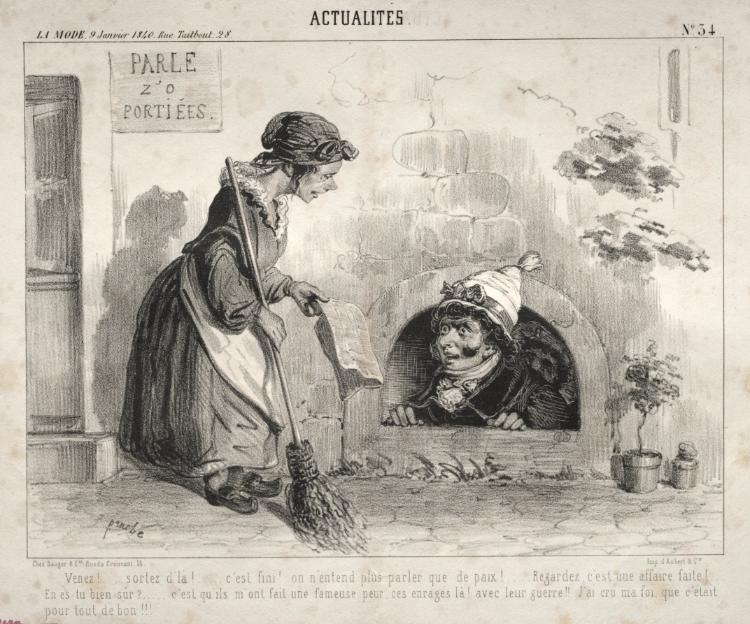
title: Actualités: Venez! ...sortez d'la! ... c'est fini! on n'entend plus parler que de paix!...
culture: France, 19th century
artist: Clémente Pruche (French, 1831–1870)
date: c. 1839–41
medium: lithograph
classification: Print